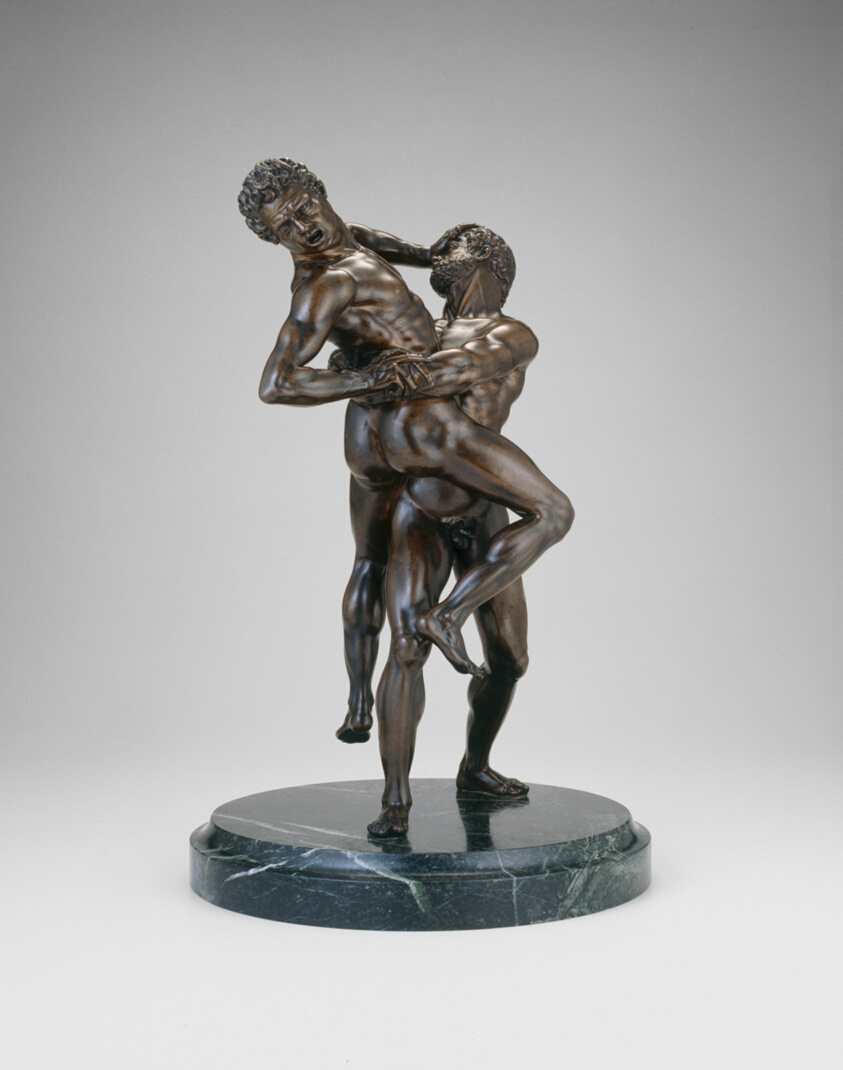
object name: Sculpture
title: Hercules and Antaeus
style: 17th Century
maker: Italian (After designs by Giambologna (Flemish, active Italy, 1529–1608))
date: 1600–1625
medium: Bronze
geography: Italy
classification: statuette; sculpture; bronze; figure; Italian; metal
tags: men, battles, figures, nudes, sculpture, strength, wrestlers